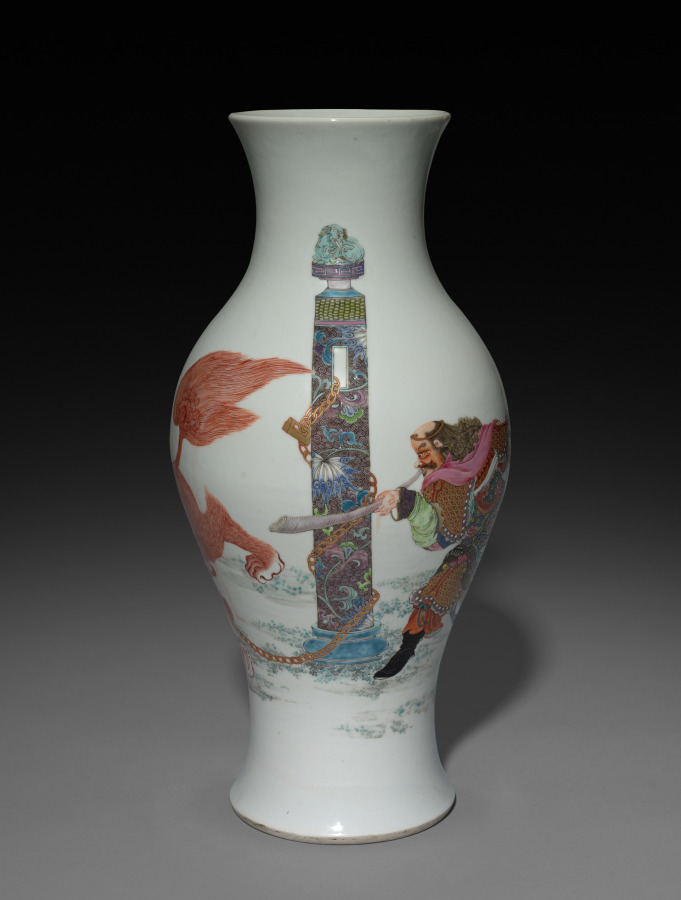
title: Vase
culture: China, Qing dynasty (1644–1911), Qianlong reign (1736–95)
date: 1736–95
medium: porcelain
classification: Ceramic